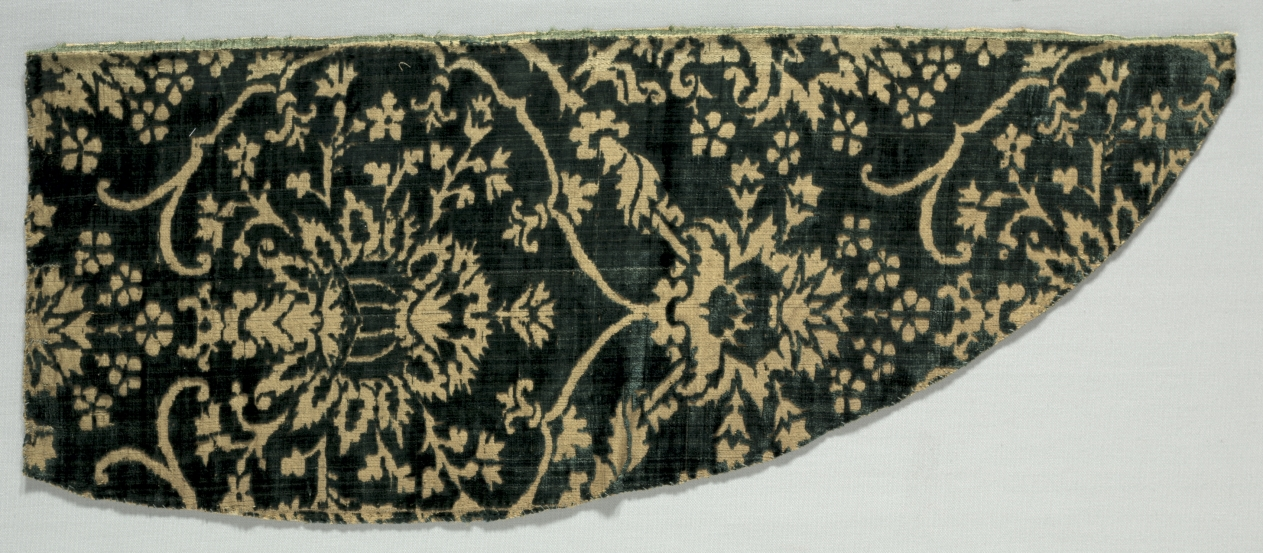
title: Velvet Fragment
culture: Italy, 15th century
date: 1400s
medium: silk velvet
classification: Velvet